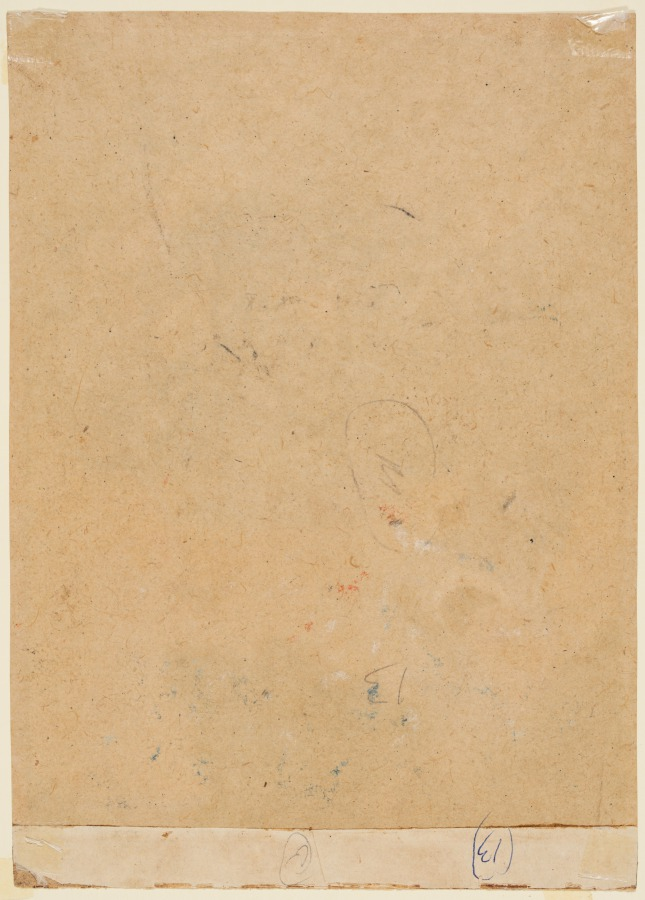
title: Krishna Playing with the Gopis in the Yamuna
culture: Northern India, Pahari kingdoms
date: c. 1770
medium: gum tempera and gold on paper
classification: Painting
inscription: 13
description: After Krishna raised Mount Govardhan, he began to play erotically with the girls of his village. Under a scorching sun, Krishna and three milkmaids enjoy the cooling waters of the Yamuna River. The women neatly stack their clothes on a nearby tree, and Krishna’s crown and scarf rest by the bank. Krishna playfully splashes one of the women, and she turns her face away. This scene evokes the joy of spending life in intimacy with the god Krishna.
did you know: Krishna playfully splashes one of the women who turns her face away.